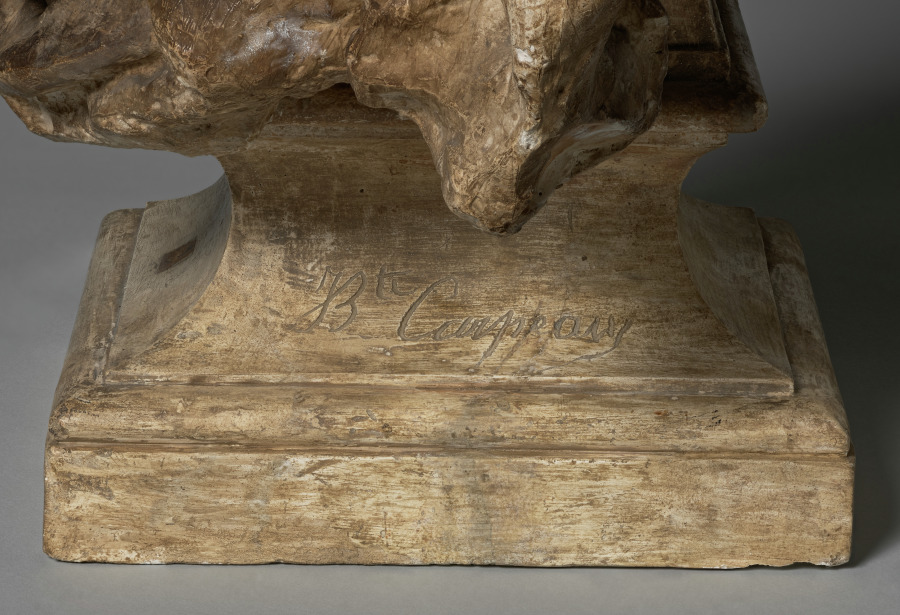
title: Why Born Enslaved!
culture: France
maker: Jean-Baptiste Carpeaux (French, 1827–1875)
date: 1867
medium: Plaster, original polychromed surface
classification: Sculpture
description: One of the most powerful expressions of abolitionist sentiment in the visual arts, Why Born Enslaved! depicts an African woman bound by ropes and looking defiantly upward. The ropes press painfully into her breasts; her torn blouse alludes to the violence responsible for her condition. The original, polychromed surface is covered with complex, nuanced hatchings and subtle modeling. Evidence indicates that this masterpiece of 19th-century French sculpture served as the master model for numerous casts in other museum collections.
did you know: Although officially abolished in France since 1848, slavery remained a hotly contested issue in Carpeaux’s time as it remained legal or tolerated in various countries around the world.